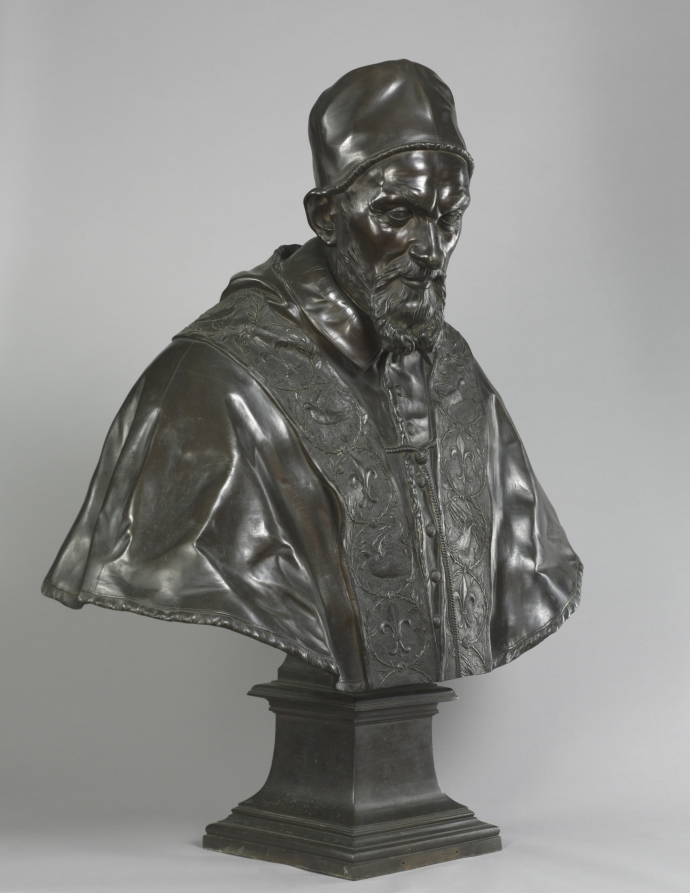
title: Portrait of Pope Innocent X Pamphili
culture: Italy, 17th century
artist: Alessandro Algardi (Italian, 1598–1654)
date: designed 1647–48; cast 1650–1700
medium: bronze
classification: Sculpture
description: Innocent X (Giovanni Battista Pamphili) was pope from 1644 until his death in 1655. Although he was not very interested in the visual arts, he followed tradition and gave several papal commissions for artistic projects. Algardi was the sculptor most frequently called upon by Innocent X. This sensitive portrait captures many details of the pope's costume as well as his intelligent, quiet face.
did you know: The pope's stole features Pamphili family emblems: fleur-de-lis and doves encircled by olive leaves.